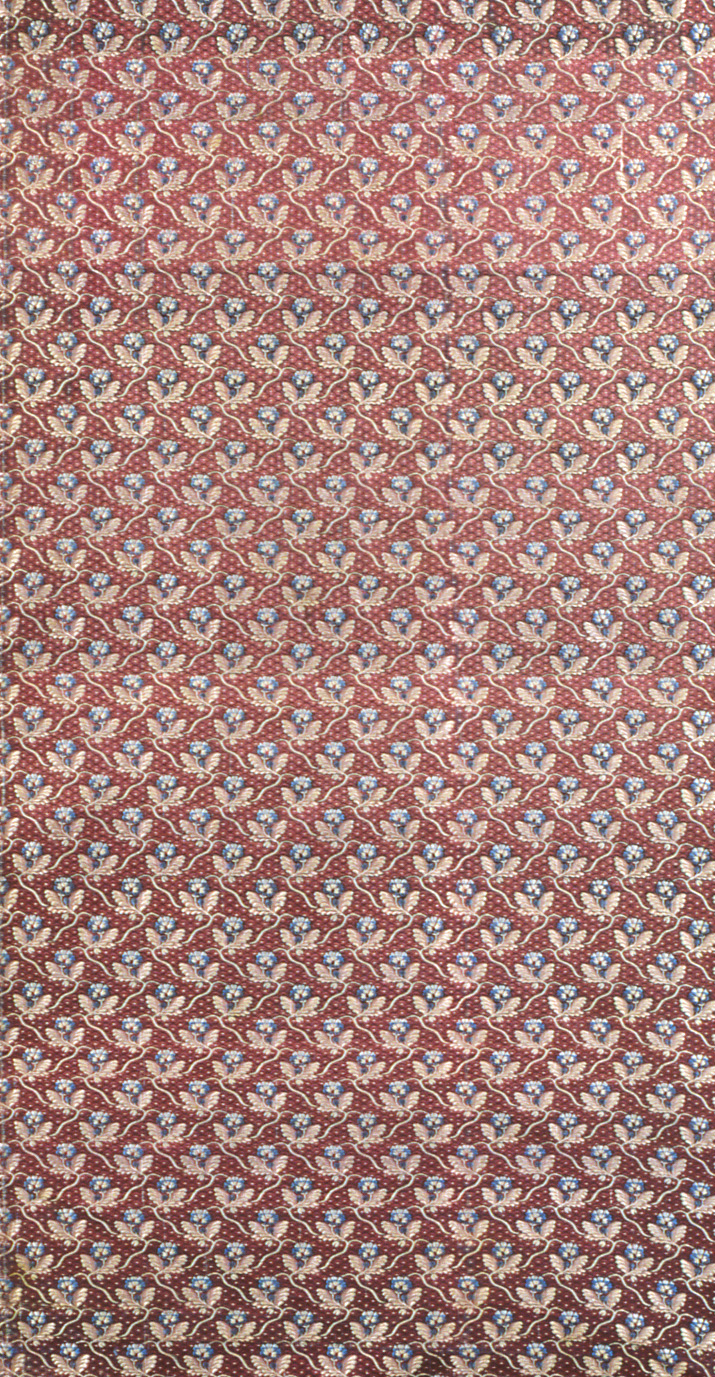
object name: Textile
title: Panel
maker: France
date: 1750/1800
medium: Silk, warp-faced plain weave; brocaded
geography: France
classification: textile; weaving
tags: fashion